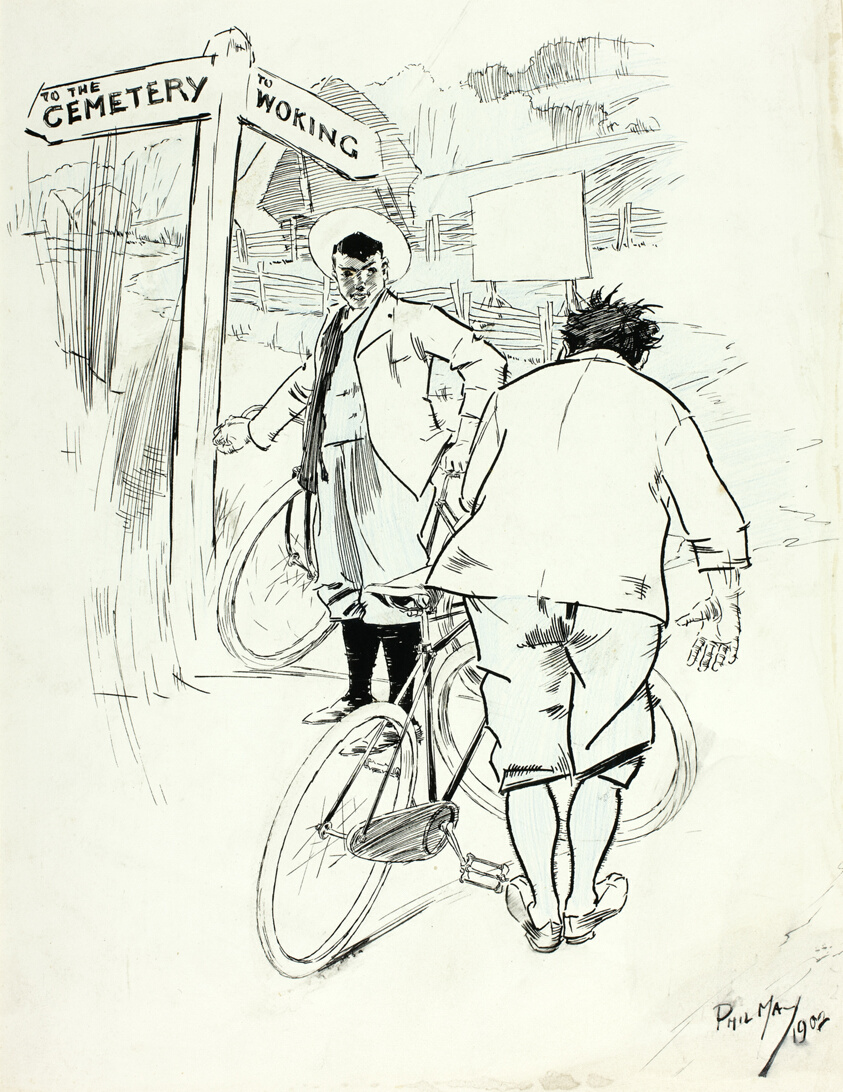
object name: Drawing and Watercolor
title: Rest for the Weary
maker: Philipp William May; English, 1864-1903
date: 1902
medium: Pen and black ink with blue pencil on ivory wove paper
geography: England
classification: pen and ink drawings; drawings (visual works); prints and drawing